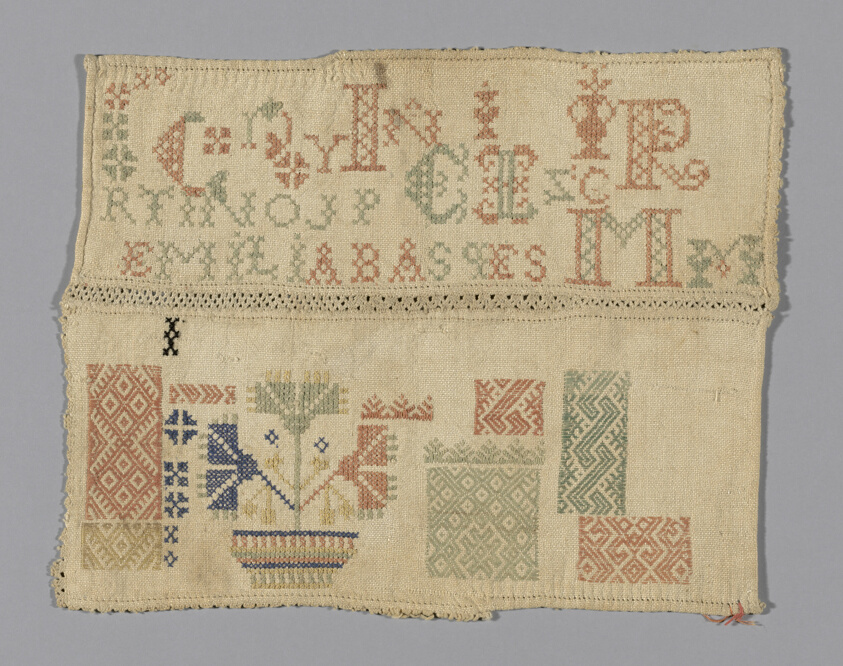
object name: Textile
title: Sampler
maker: Spain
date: 19th century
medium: Cotton and linen, plain weave; embroidered in cross and darning stitches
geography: Spain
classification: textile; needlework (visual works); sampler